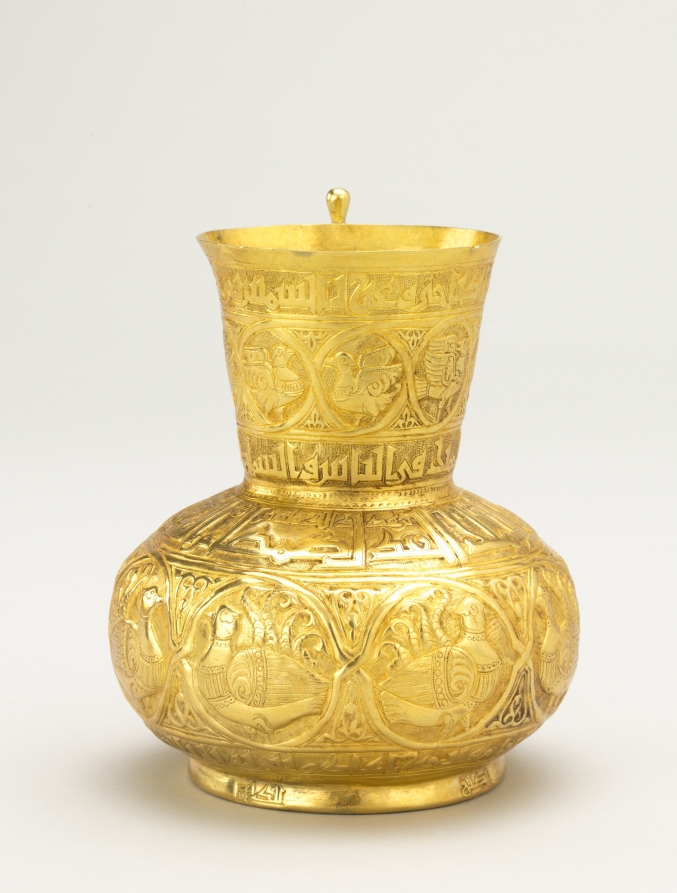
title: Jug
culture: Iran or Iraq, Baghdad, Buyid Period, reign of Samsam al-Dawla (985-998 AD)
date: late 900s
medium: gold with repoussé and chased and engraved decoration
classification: Metalwork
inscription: The inscription bands contain Arabic poetry which translates, in part: "You are the image of the full moon at night, the first gleam of sun on the horizon of the morning. You are a sword in the times of war, a beneficent rain in times of peace...your sword cuts the necks of Buyid enemies in great quantities...Glory and prosperity to the just king Samsam al-Dawla...May God lengthen your reign!"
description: This jug is one of the rare surviving Islamic vessels made entirely of precious metal. Its inscription bands contain Arabic poetry that translates, in part: "You are the image of the full moon at night, the first gleam of sun on the horizon of the morning. You are a sword in the times of war, a beneficent rain in times of peace . . . your sword cuts the necks of Buyid enemies in great quantities . . . Glory and prosperity to the just king Samsam al-Dawla . . . May God lengthen your reign!"